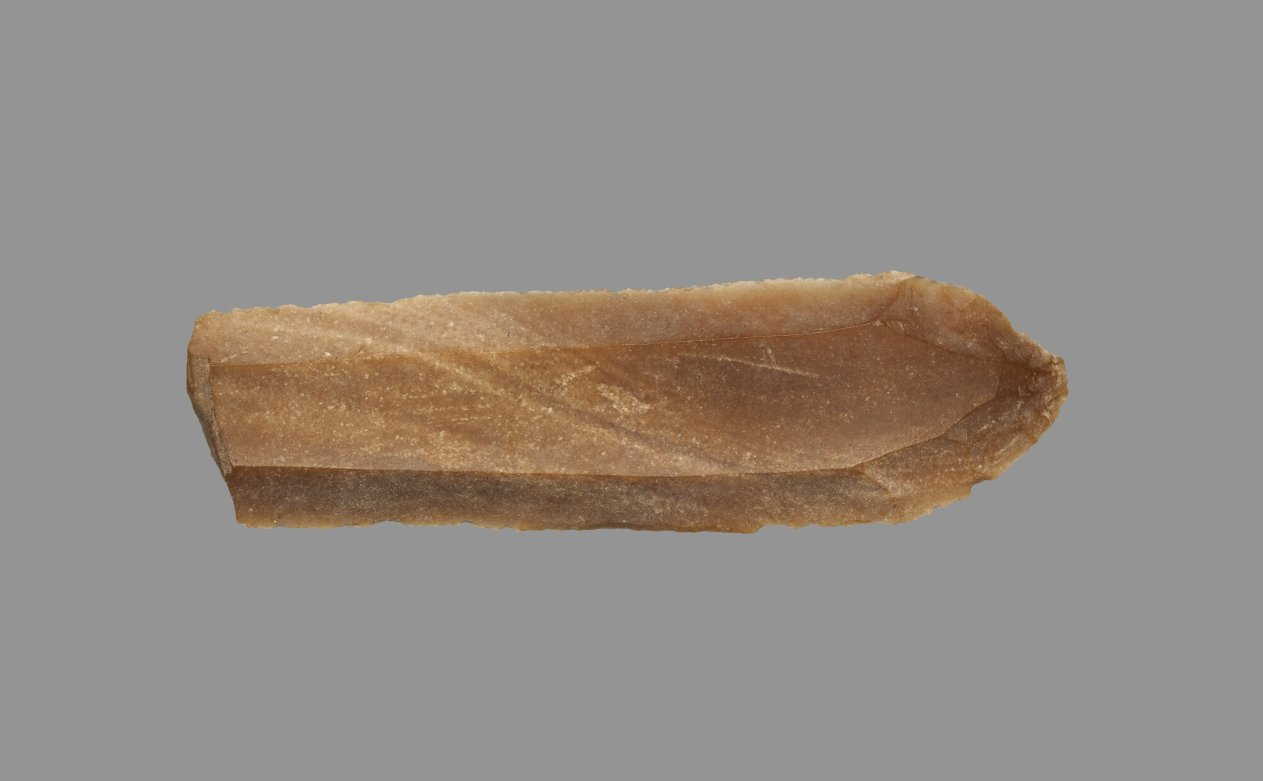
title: Sickle Blade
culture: Egypt, Middle Kingdom (2040–1648 BCE), Dynasty 12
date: 1980–1801 BCE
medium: flint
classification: Implements